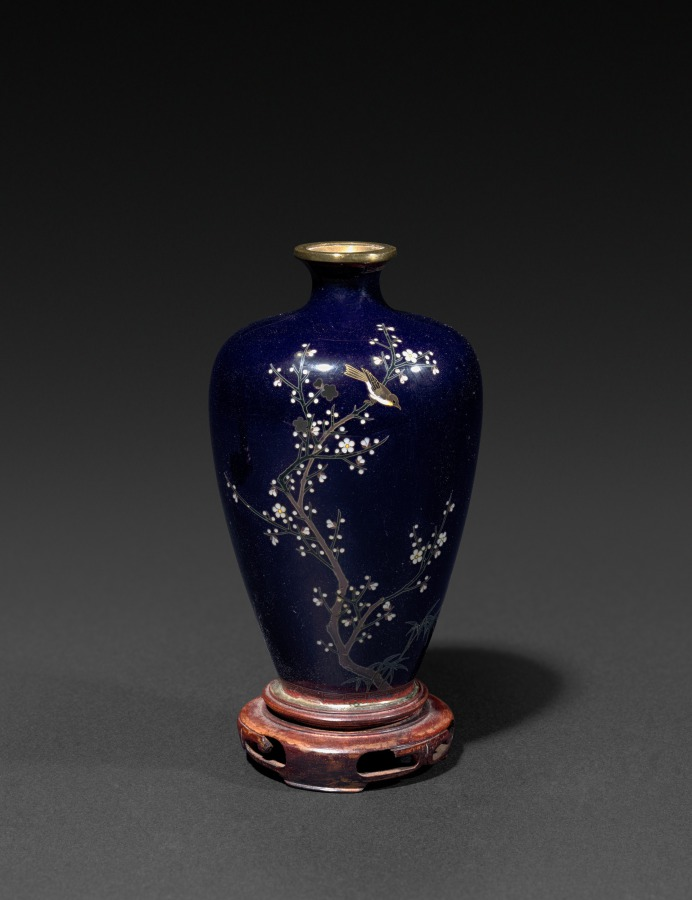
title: Vase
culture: Japan, Meiji period (1868–1912) to Taishō period (1912–26)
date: early 1900s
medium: One of a pair; cloisonne with carved wood base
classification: Enamel